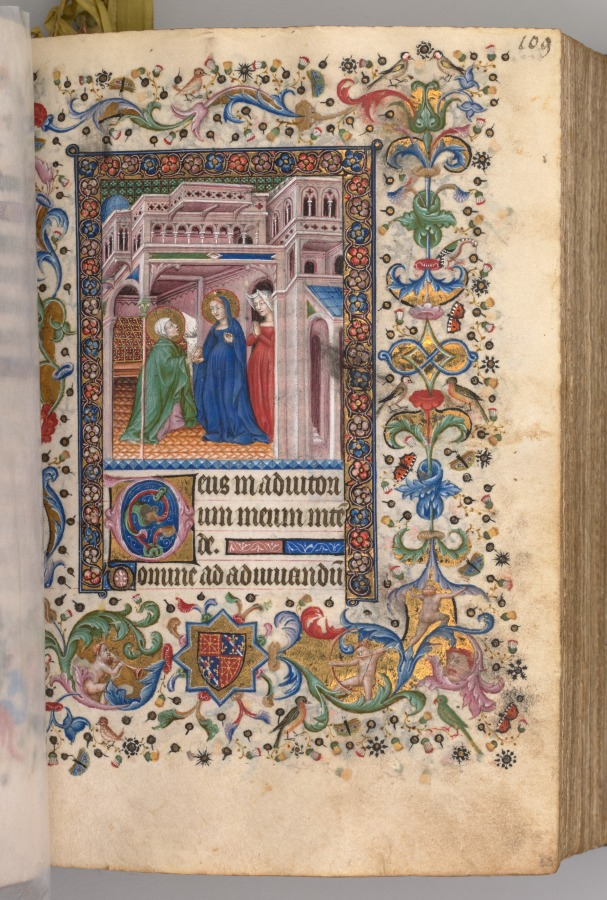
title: Hours of Charles the Noble, King of Navarre (1361-1425): fol. 55r, The Visitation (Lauds)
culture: France, Paris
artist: Master of the Brussels Initials and Associates (French)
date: c. 1405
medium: ink, tempera, and gold on vellum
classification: Bound Volume